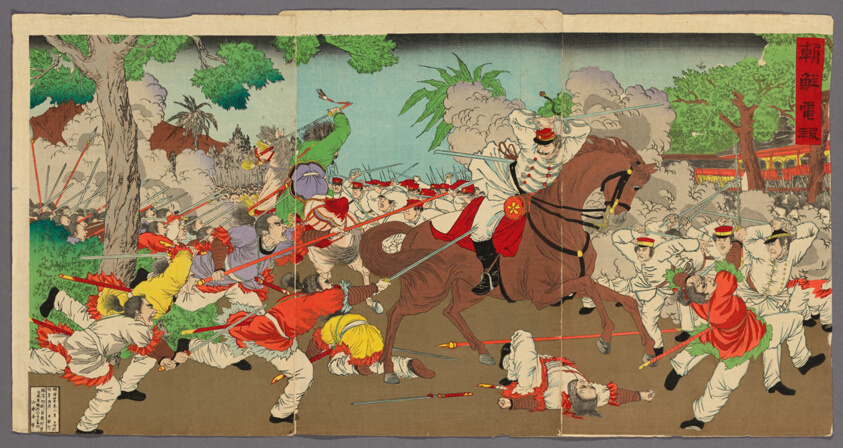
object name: Print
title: Telegram from Korea (Chosen denpo)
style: Japanese (culture or style)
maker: Unknown Artist; Japanese, active 1890s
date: 1894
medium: Color woodblock print; oban triptych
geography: Japan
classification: woodblock print; print